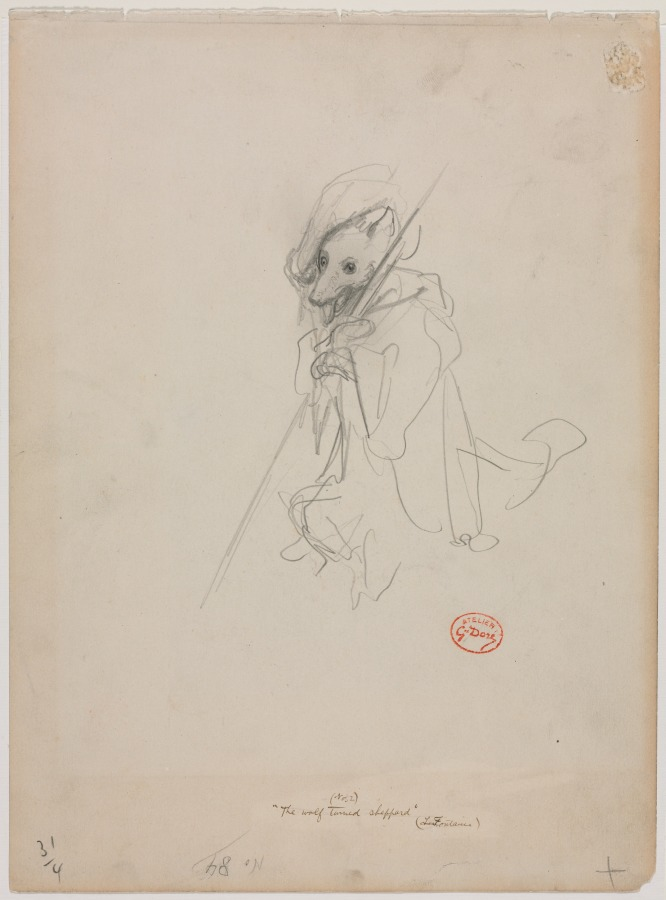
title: Sketch for "The Wolf Turned Shepherd" (recto) Sketch of Hunting Scene (verso)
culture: France, 19th century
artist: Gustave Doré (French, 1832–1883)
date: c. 1868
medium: graphite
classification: Drawing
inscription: lower left, in graphite: 31/4 ; lower center, in brown ink: (No. 2) / "The wolf turned sheppard" / (LaFontaine) ; lower center, in graphite: No 84 [upside down] [84 underlined] ; lower right, in graphite: X